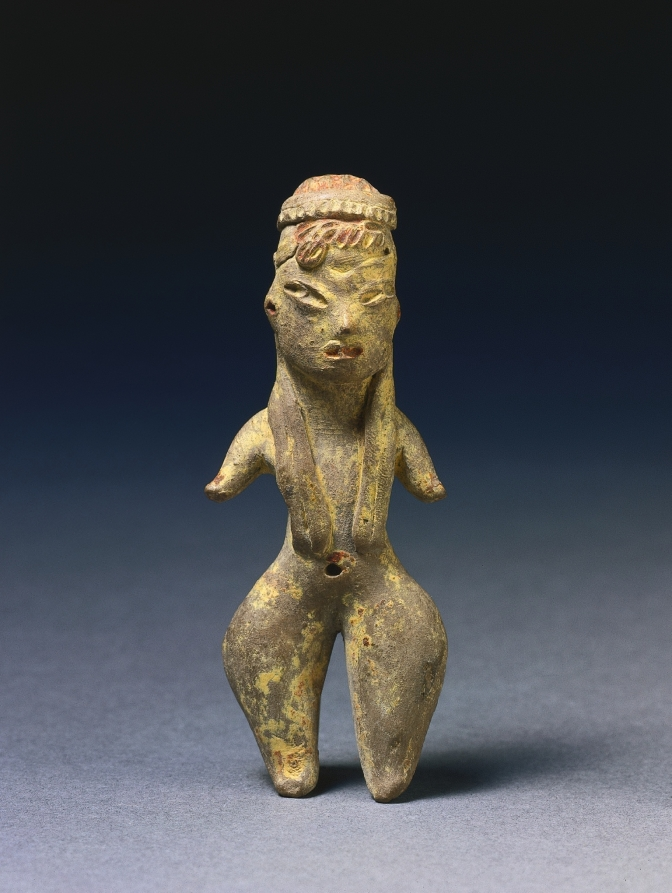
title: Standing Female Figurine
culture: Mesoamerica, Central Mexico, Tlatilco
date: 1200–400 BCE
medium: Ceramic, pigment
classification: Ceramic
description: This figurine represents the best-known type found in graves at Tlatilco, an early farming village on the outskirts of Mexico City. The type is known as the “pretty lady” after its representatives’ sweet faces, fancy hairstyles, pinched waists, and flaring hips and thighs.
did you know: This figurine represents the best-known type found in graves at Tlatilco, an early farming village.